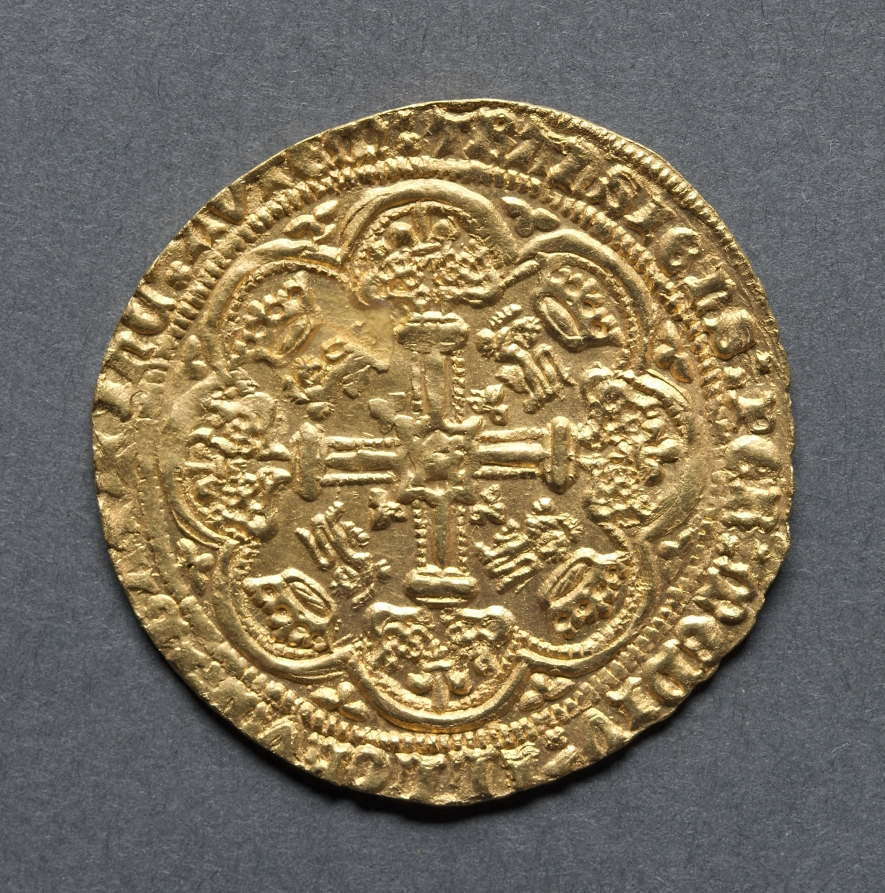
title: Noble: Ornamental Cross with Lis Terminals (reverse)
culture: England, Henry V, 1413-1422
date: 1413–1422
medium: gold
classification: Coins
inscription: IHC AUTEM TRANSIENS PER MEDIUM ILLORR IBAT